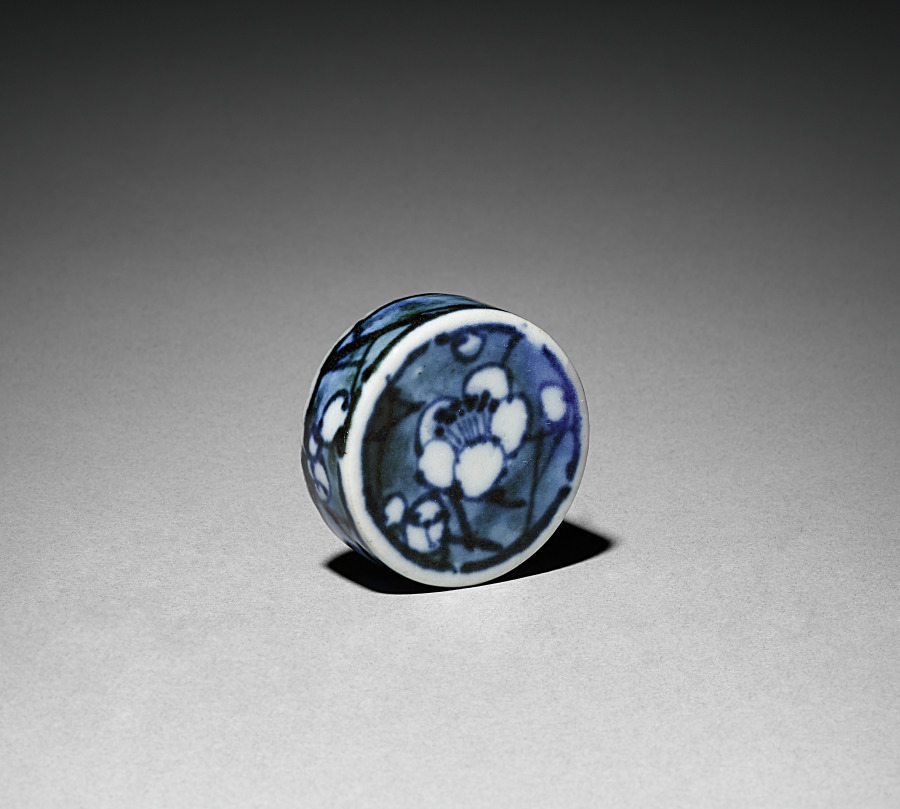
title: Tea Container (lid) with Plum Blossoms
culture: Japan, Edo period (1615–1868)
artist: Aoki Mokubei (Japanese, 1767–1833)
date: early 1800s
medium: porcelain with underglaze blue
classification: Ceramic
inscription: signed "Ro Mokubei" on base in underglaze blue.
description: Aoki Mokubei, born into a family of restaurateurs, was a potter, calligrapher, painter, and scholar, and is considered one of the three masters of later Edo period Kyoto ceramics. He specialized in porcelains fashioned after Chinese prototypes, and created works for steeped tea (sencha) such as these matching tea caddies decorated in an underglaze blue called sometsuke—literally “with applied dye.” He signed them on their bottoms. They also have intricately patterned silk sleeves to both beautify and protect them. On the exterior of the lid of the outer wooden box that contains them, it is written that Mokubei inscribed and painted an image on the box. On the interior of the lid, the signature and seals of a former owner are written. Mokubei has signed the lid of the inner box, and a charming ink and light color composition of West Lake in Hangzhou in China covers its three sides. On the fourth side is a long inscription by Mokubei describing the scene.